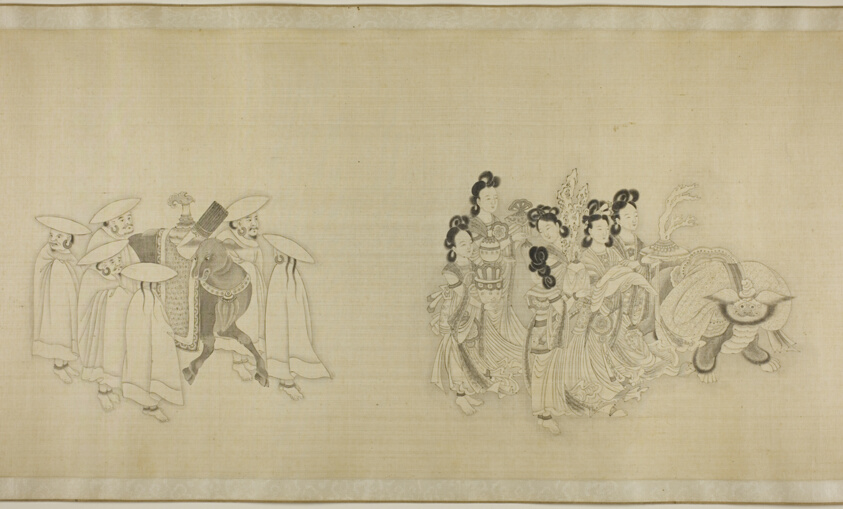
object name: Painting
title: Barbarian Envoys Presenting Tribute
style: Chinese (culture or style)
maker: Chinese; Artist unknown; spurious signature of Su Liupeng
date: Qing dynasty (1644–1911), c. 1850/1900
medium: Handscroll; ink on silk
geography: China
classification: handscroll; painting; asian art